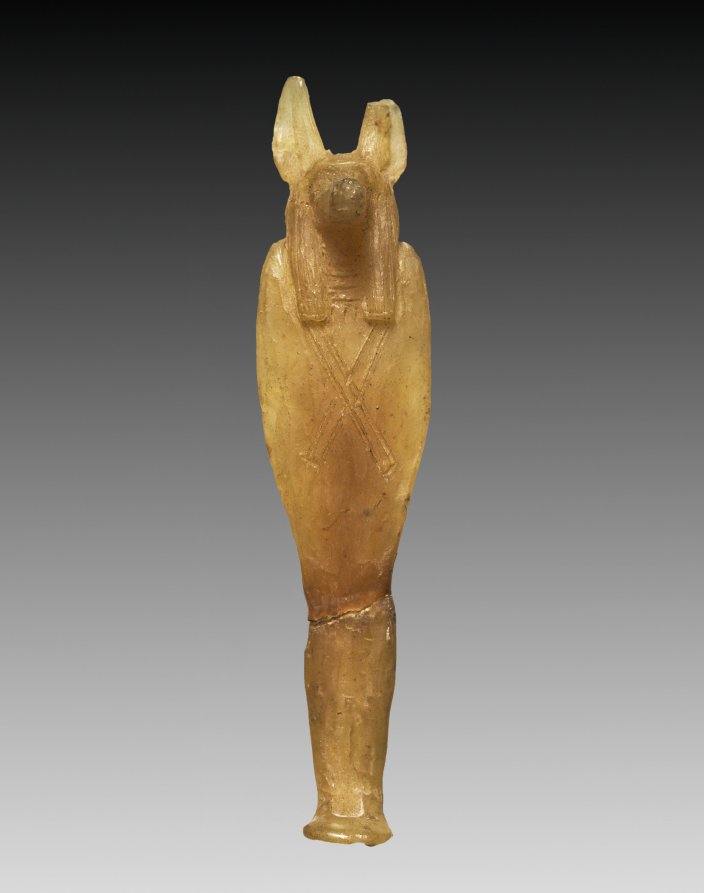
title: Son of Horus: Duamutef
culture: Egypt, Third Intermediate (1069–715 BCE), Dynasties 21–22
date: 1000–900 BCE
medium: honey-colored wax with dark amber varnish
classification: Funerary Equipment